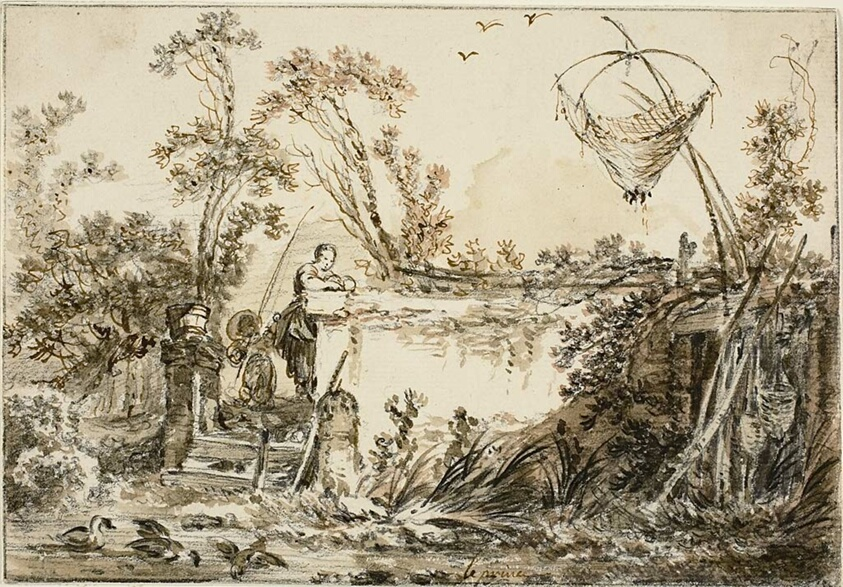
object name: Drawing and Watercolor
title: Study for the Frontispiece, for Varie Vedute del Gentile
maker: Jean-Baptiste Le Prince; French, 1734-1781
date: c. 1755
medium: Pen and brown ink, with brush and brown wash, over black chalk, on ivory laid paper, tipped onto ivory wove paper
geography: France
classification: ink or chalk wash; drawings (visual works); prints and drawing